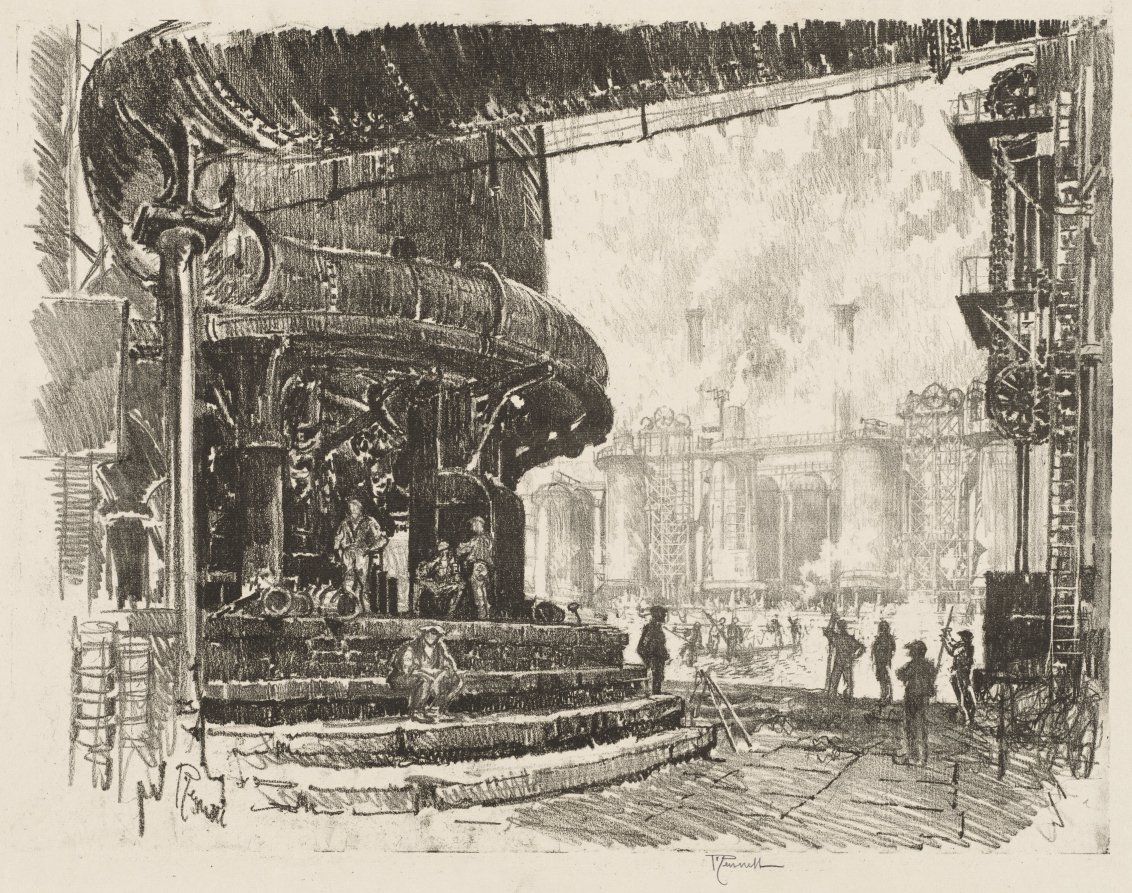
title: English War Work: Making Pig Iron, The Base of the Blast Furnaces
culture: America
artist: Joseph Pennell (American, 1857–1926)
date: 1916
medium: lithograph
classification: Print